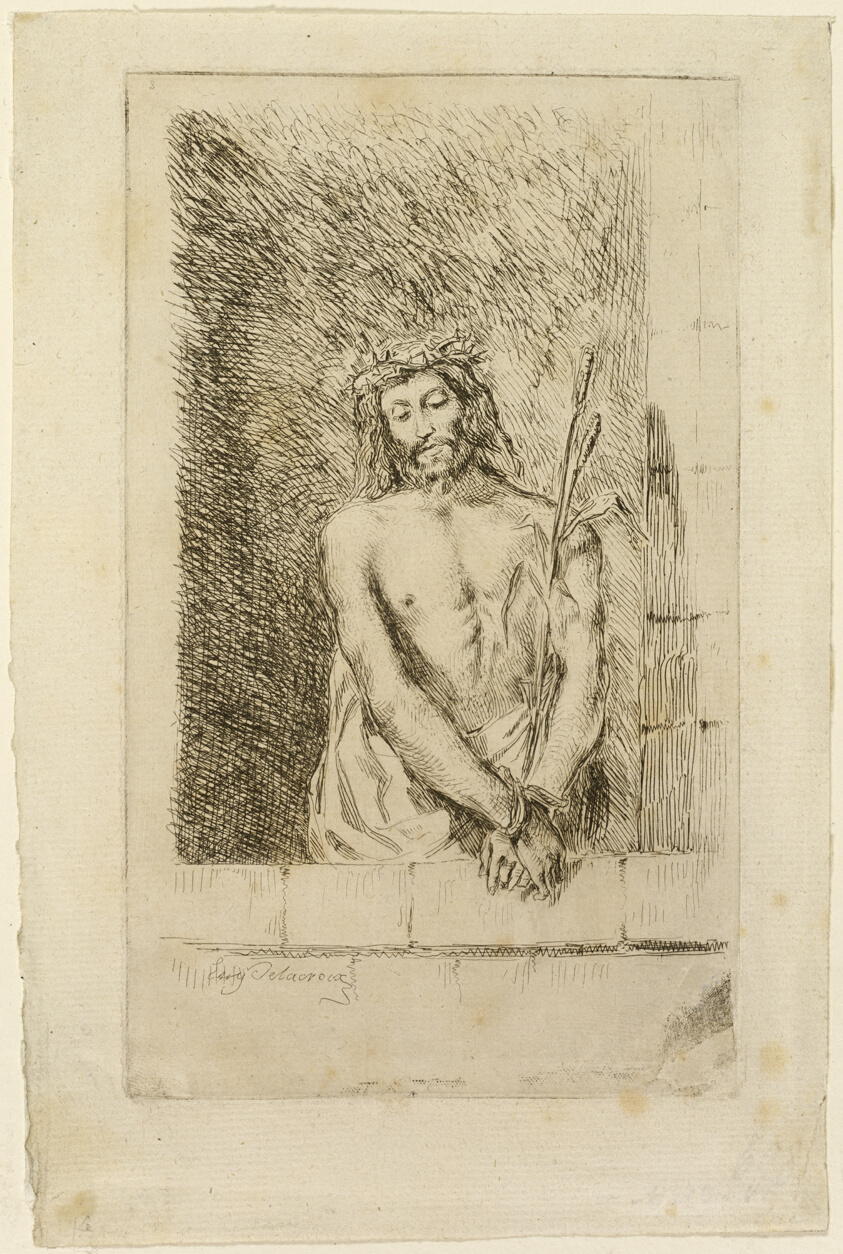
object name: Print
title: Christ with the Reed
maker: Eugène Delacroix (French, 1798-1863)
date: 1833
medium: Etching in dark brown on ivory laid paper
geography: France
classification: etching; print; prints and drawing